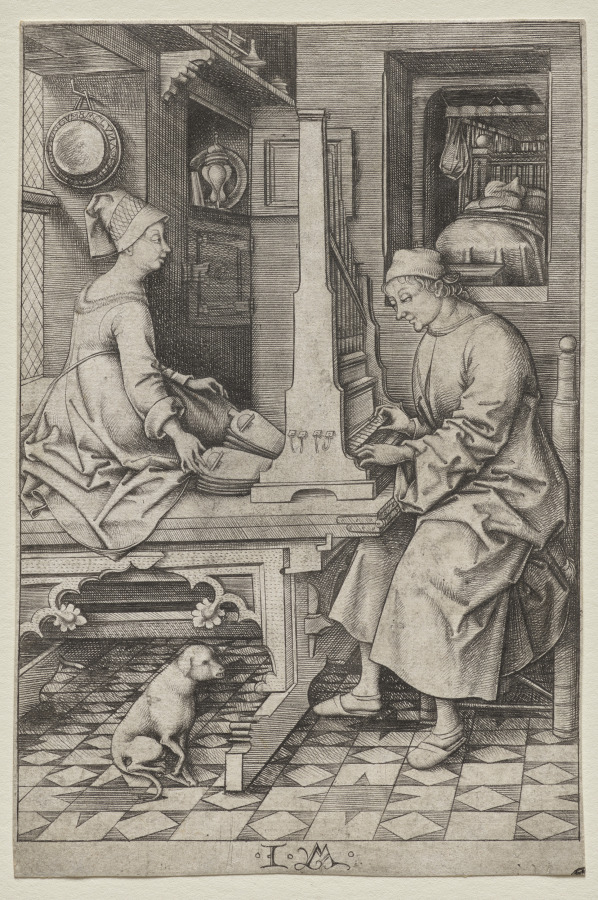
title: The Organ Player and His Wife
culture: Germany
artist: Israhel van Meckenem (German, c. 1440–1503)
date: 1495–1500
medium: engraving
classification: Print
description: In a cozy, domestic setting, an organ player plays a portative with four registers. His wife operates the two bellows, producing the wind that gives the instrument its sound. The activity of one would be inconceivable and pointless without the other. The music they create together--as well as the faithful dog placed prominently in the foreground--refers to marital harmony.